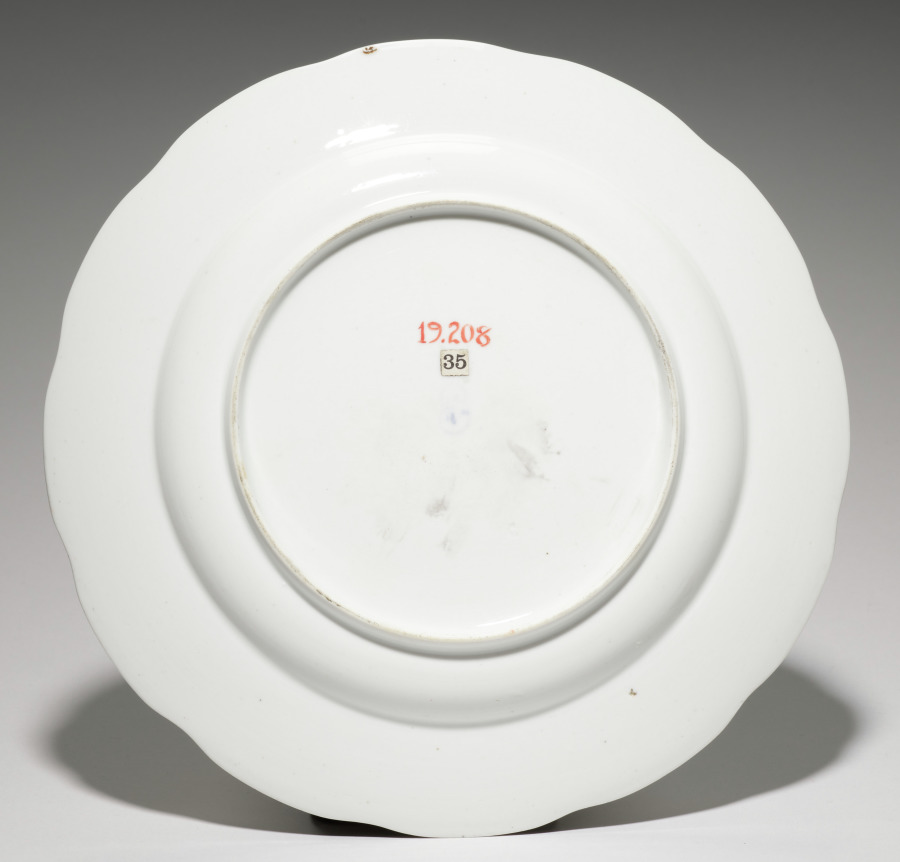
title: Plate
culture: Russia, St. Petersburg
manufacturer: St. Petersburg Imperial Porcelain Factory (Russian)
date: 1762–1796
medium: porcelain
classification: Ceramic